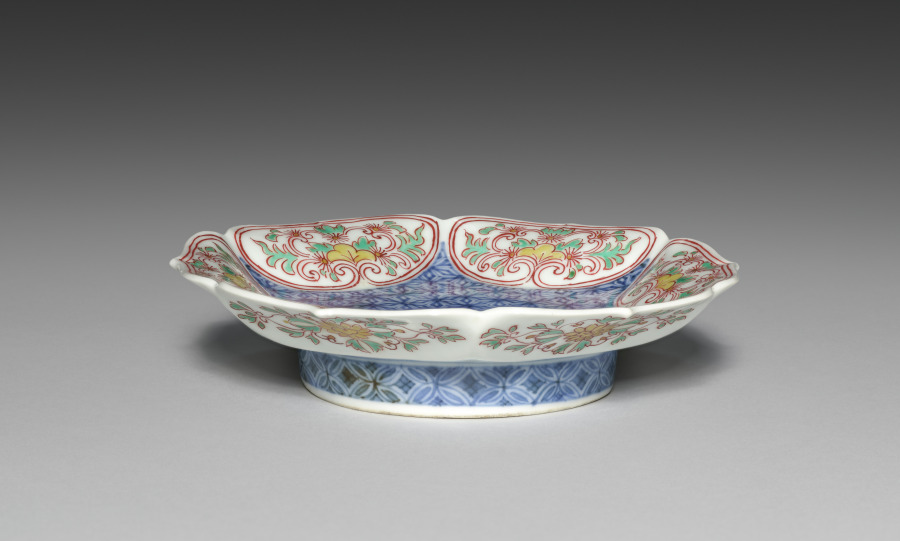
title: Small Dish (Kozara) with Hemp-Leaf Pattern and Bellflower Rim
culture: Japan, Edo period (1615–1868)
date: c. 1670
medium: Porcelain with underglaze blue and color enamel (Hizen ware, Nabeshima type)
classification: Ceramic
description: This dish combines underglaze blue decoration with overglaze color enamels. In between is a transparent glaze.